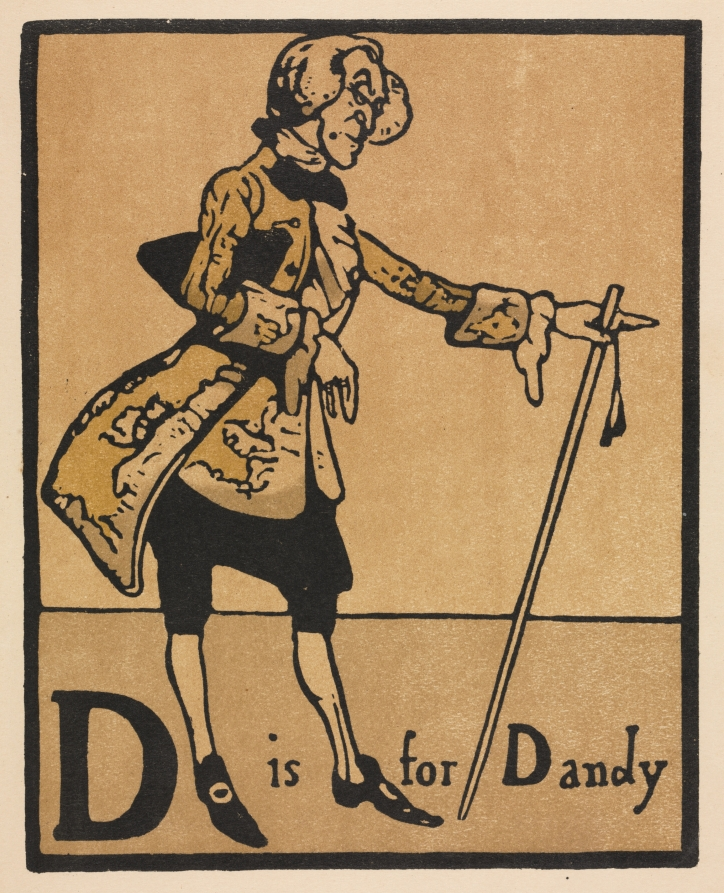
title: An Alphabet: D is for Dandy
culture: England, 19th century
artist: William Nicholson (British, 1872–1949)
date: 1897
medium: color lithograph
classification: Print